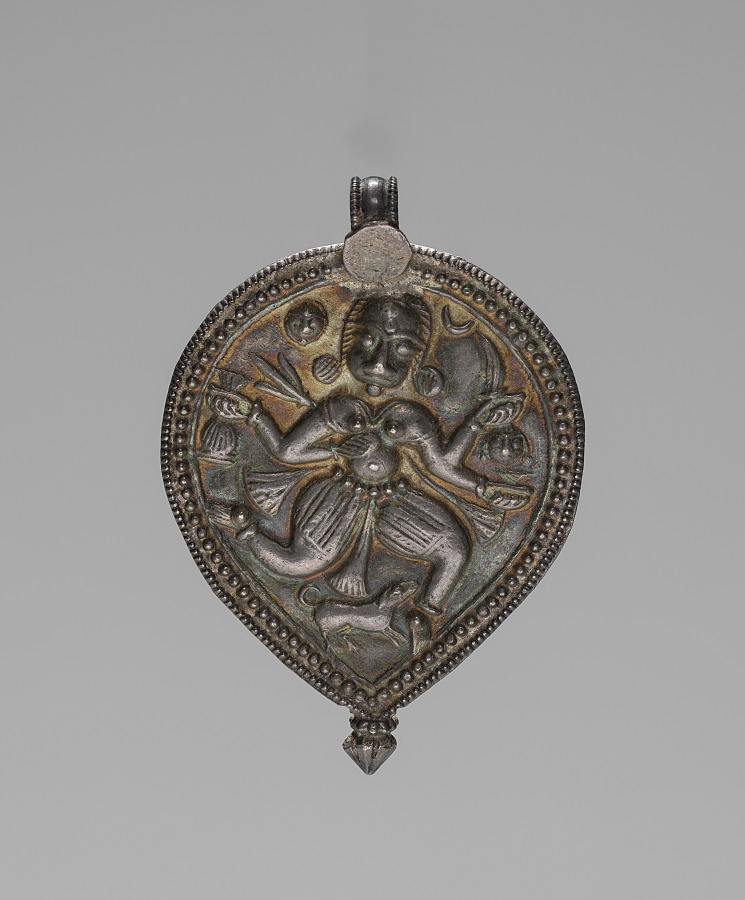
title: Amulet in the Shape of a Pipal Leaf (Ficus religiosa) with Four-armed Dancing Shiva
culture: India, Ajmere, Bombay Presidency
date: 1800s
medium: silver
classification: Jewelry